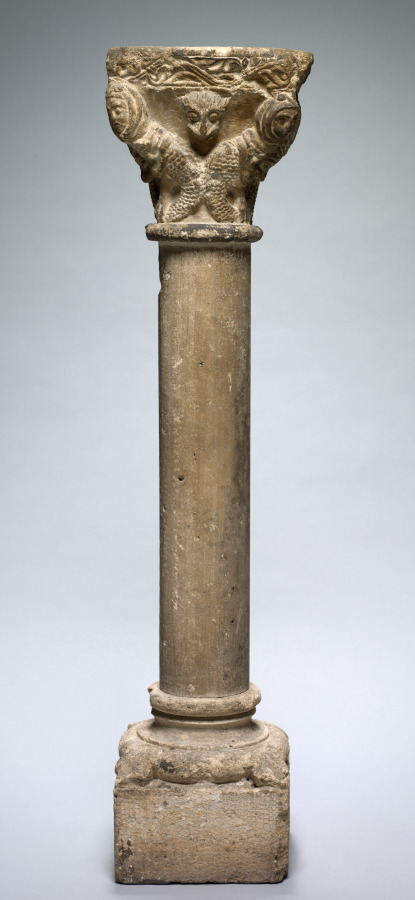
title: Capital with Addorsed Harpies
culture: Southwest France, Languedoc, Toulouse (?), 13th century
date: 1200s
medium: limestone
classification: Sculpture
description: Monstrous images were prevalent in the decoration of religious buildings during the Middle Ages. Such images must have impressed, perhaps even terrified, the monks and visitors who spent much of their time within the cloister or church, a place of prayer, contemplation, and reflection. Scholars have speculated how such images would have been received by the people given the ubiquity of monsters in medieval society. The carved monsters, often symbolizing vice and retribution for sin, were possibly designed to provoke a range of emotional responses including laughter, wonder, surprise, fear, and shock. This striking imagery must have had a strong impact, which in turn led Saint Bernard of Clairvaux (1090–1153), the spiritual head of the Cistercian order, to admonish their use as distracting from prayer.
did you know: A harpy is part bird and part woman featured often in Greek mythology.